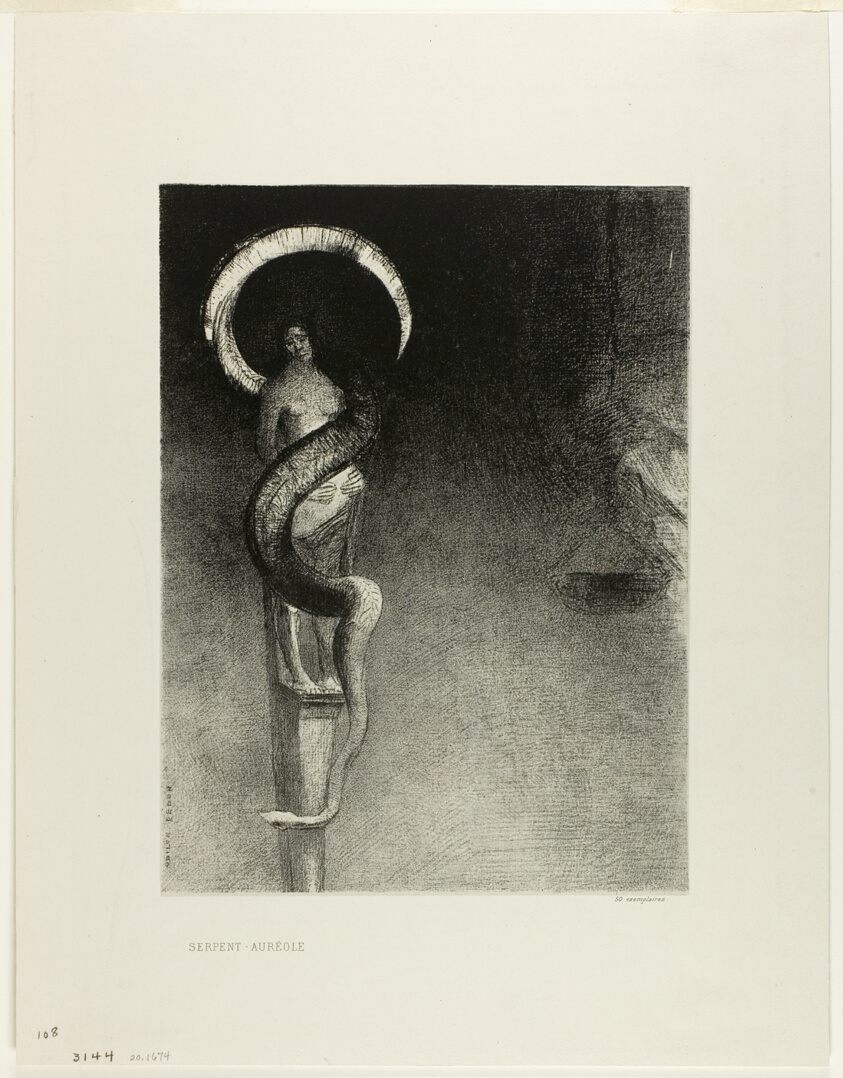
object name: Print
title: Serpent Halo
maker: Odilon Redon (French, 1840-1916)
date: 1890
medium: Transfer lithograph on mounted ivory China paper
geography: France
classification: lithograph; print; prints and drawing; paper